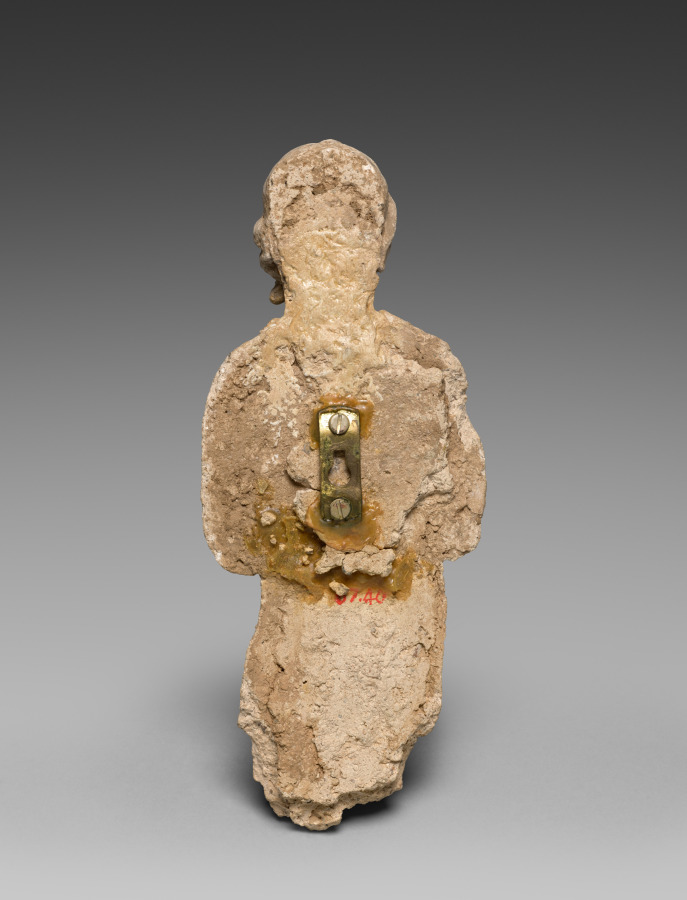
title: Layman bearing offerings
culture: Afghanistan, Hadda, probably Tape Shotor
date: c. 300 CE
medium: stucco with mother-of-pearl inlay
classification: Sculpture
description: The Buddhist monasteries at Hadda were famous internationally until their destruction by fire in the 800s CE. One thousand years later, a British explorer named Charles Masson (1800–1853) documented the site and collected many sculptures from the ruins that are now in the British Museum in London. French archaeologists carried out systematic excavations between 1926 and 1929. They brought many sculptures to the National Museum of Asian Art, Guimet, in Paris. Some sculptures entered other museum and private collections around the world. In the 1970s, Afghan archaeologists continued to document the Buddhist sites of Hadda and brought many more sculptures to the National Museum of Afghanistan in Kabul.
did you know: The Buddhist community (sangha) consists of both monks and laypeople who brought wealth to support the monasteries at Hadda.